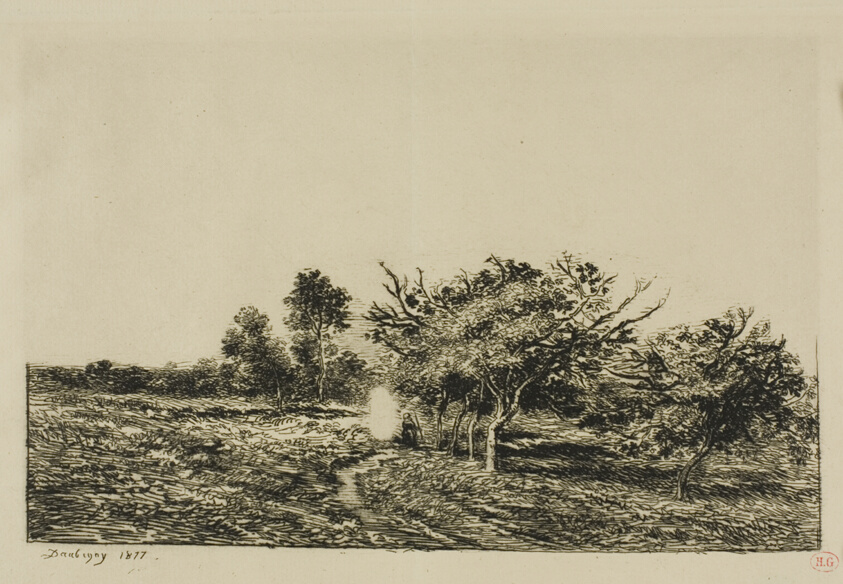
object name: Print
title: Apple Trees at Auvers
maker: Charles François Daubigny (French, 1817-1878)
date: 1877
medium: Etching and drypoint on ivory laid paper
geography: France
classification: etching; print; prints and drawing